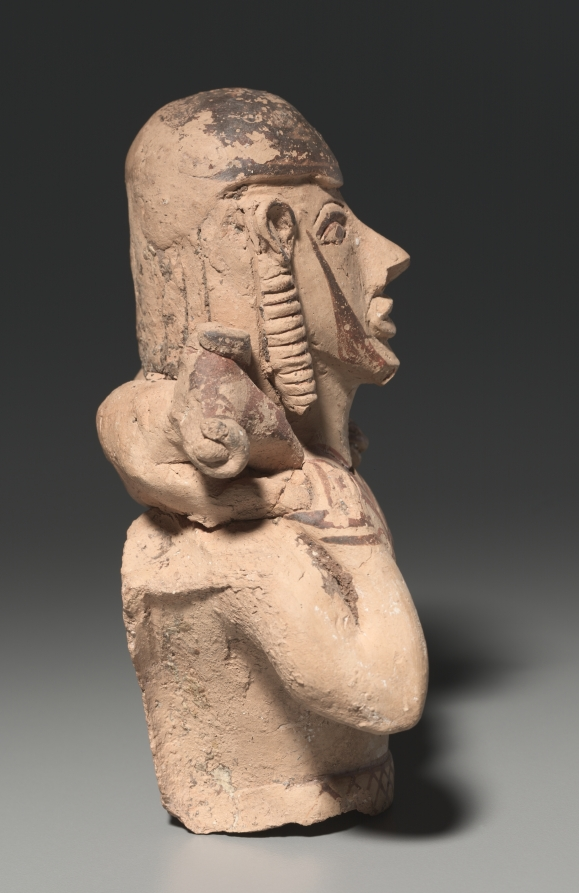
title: Kriophoros (Ram-Bearer), Statuette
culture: Greece, Crete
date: 650–600 BCE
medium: terracotta and polychrome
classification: Sculpture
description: In Greek art, the kriophoros is usually a shepherd or, later, Hermes. This statuette may be unique in presenting a warrior-hero as kriophoros. It is certainly one of the earliest sculptural representations of this type. The figure appears to be wearing a helmet, secured under the chin with a painted strap. Double outlines, reinforced at the bottom with incision and adorned with dotted circles in the area of the nipples, were used to suggest breastplates. A thick waist belt, decorated with painted crosshatched lines, is clearly the heroic zoster (warrior's belt). As described in ancient Homeric poetry, the zoster is the ultimate symbol of valor and prowess, worn by such heroes as the brothers Agamemnon and Menelaos and old King Nestor. This figure is shown in the solemn act of presenting a ram, most likely as a sacrificial offering, to a god or goddess.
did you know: This heroic figure is shown presenting a ram, most likely as a sacrificial offering to a god or goddess.